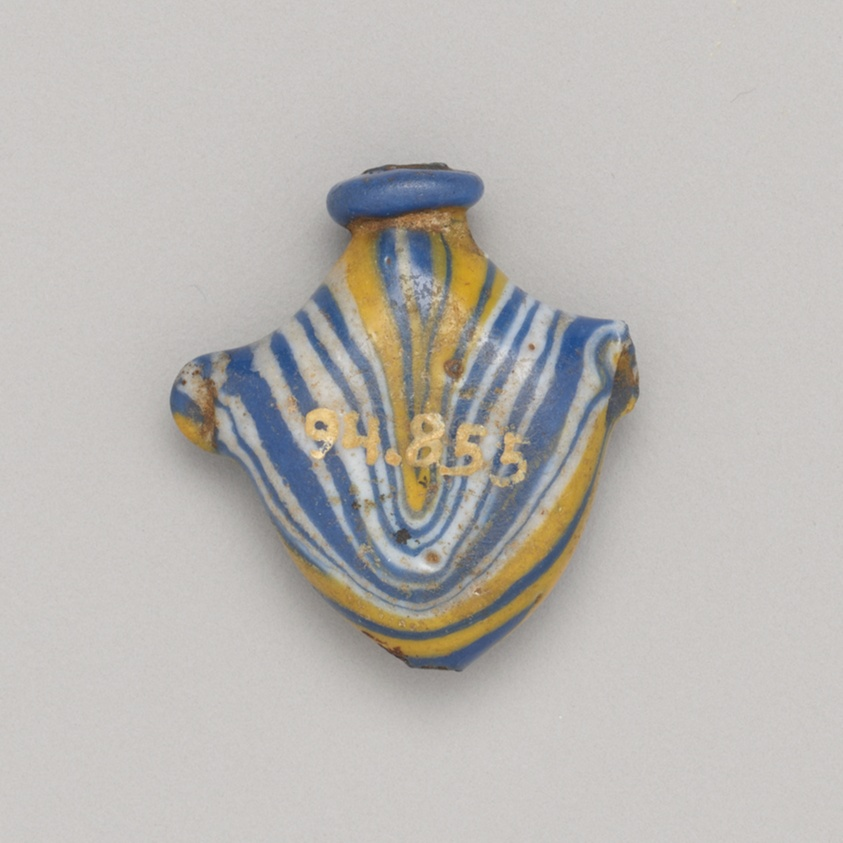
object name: Costume and Accessories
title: Amulet of a Heart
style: eighteenth dynasty, new kingdom, egyptian, ancient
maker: Egyptian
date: New Kingdom, Dynasty 18 (about 1550–1295 BCE)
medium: Glass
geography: Egypt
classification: amulet; bead; jewelry; ancient art; costume